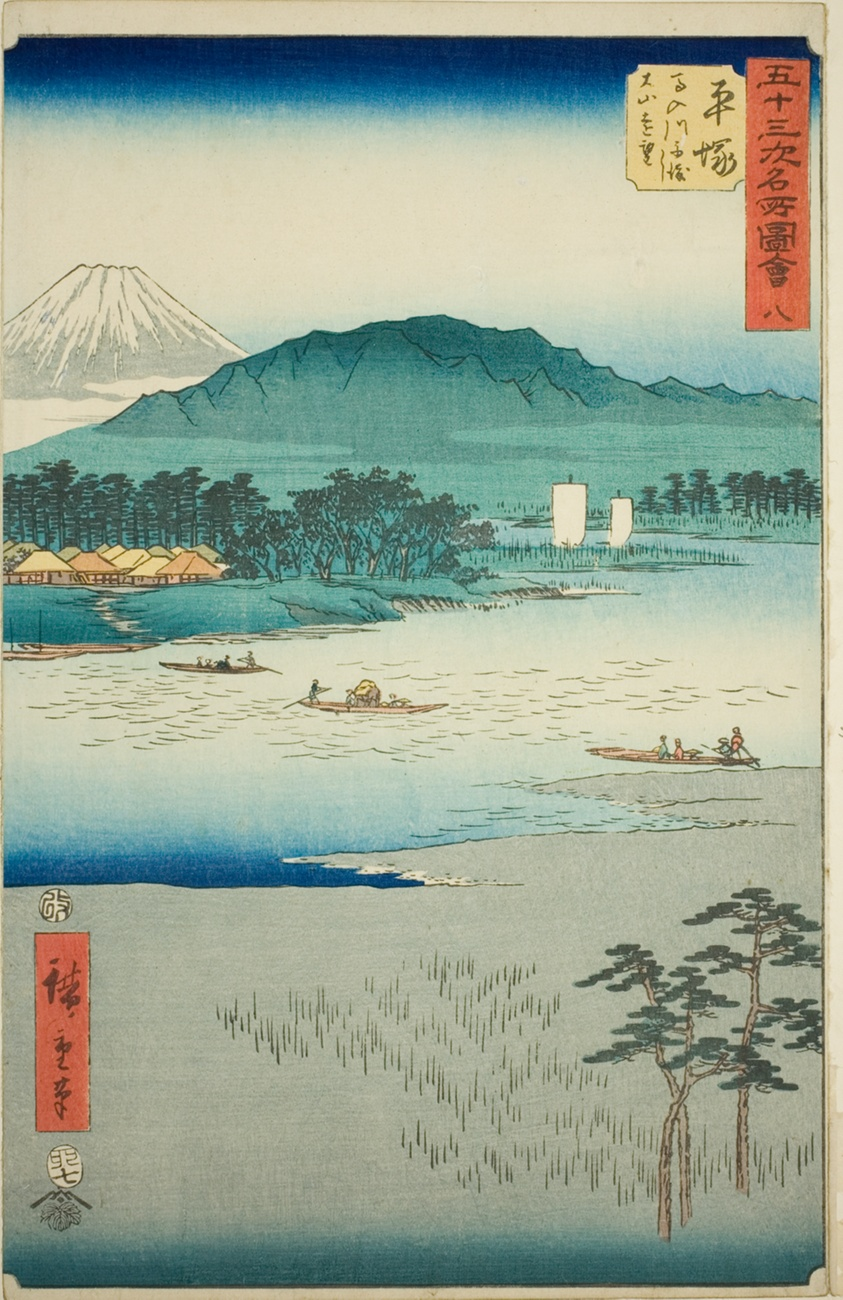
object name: Print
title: Hiratsuka: Ferry on the Banyu River and Distant View of Mount Oyama (Hiratsuka, Banyugawa funewatashi Oyama enbo), no. 8 from the series "Famous Sights of the Fifty-three Stations (Gojusan tsugi meisho zue)," also known as the Vertical Tokaido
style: Japanese (culture or style)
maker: Utagawa Hiroshige 歌川 広重; Japanese, 1797-1858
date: 1855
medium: Color woodblock print; oban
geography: Japan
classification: woodblock print; print; asian art